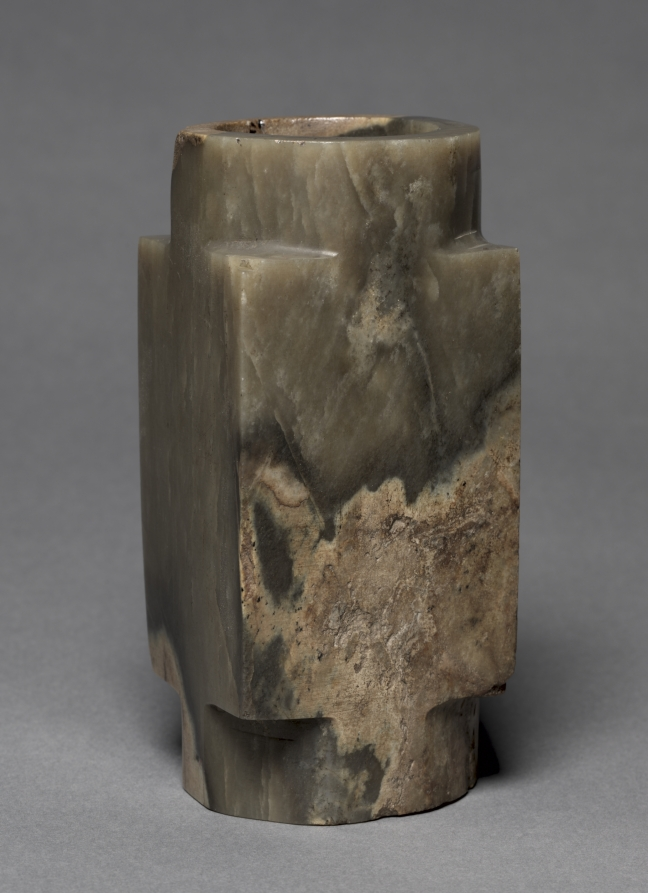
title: Ceremonial Tube (Cong)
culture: China, Shang dynasty (c. 1600–c. 1046 BCE)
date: c. 1600–1056 BCE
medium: jade (nephrite)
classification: Jade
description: The cong, a cylindrical tube with a square outer section, was one of the most impressive jade implements used in ancient rites. The ritual text Rites of Zhou mentions the use of the cong for the worship of the earth. However, its function and meaning in the earlier Neolithic societies are not completely understood.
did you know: The Interior cavity of this piece of jade was bored from both ends, making an irregular ridge near the center.